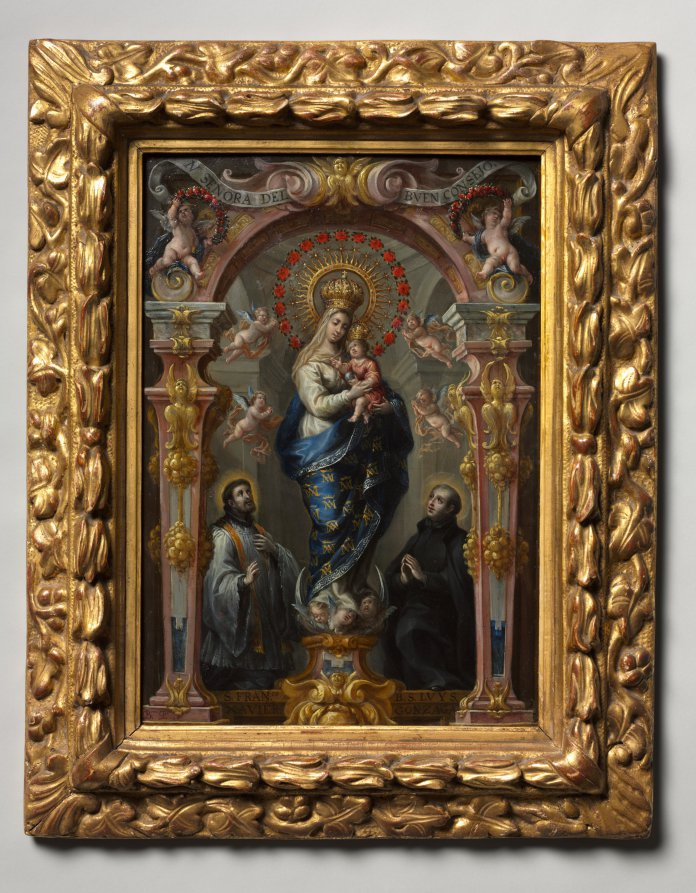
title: Our Lady of Good Counsel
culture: Spain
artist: Bartolomé Pérez (Spanish, 1634–1693)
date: c. 1680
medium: oil on copper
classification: Painting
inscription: Signed lower left: "B.me. P.z D." In ribbon on top: N. Señora del /Buen Consejo Under figure at left: S. Franco Under figure at right: B.S. Luys. Gonzaga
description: This painting loosely and inventively depicts an actual chapel in the former Jesuit Imperial College in Madrid, which housed a Madonna and Child in gilded and painted wood, a focus of popular devotion. Pérez made temporary decorations for the Spanish court, none of which survive, but the fanciful architecture, curiously inverted obelisks, fruits and flowers, and pastel colors all stem from this side of his work. By representing a polychrome sculpture in two dimensions, Pérez further blurred boundaries between painting and sculpture. This intersection of the spiritual and the real worlds was important in Spanish art of the 1600s.